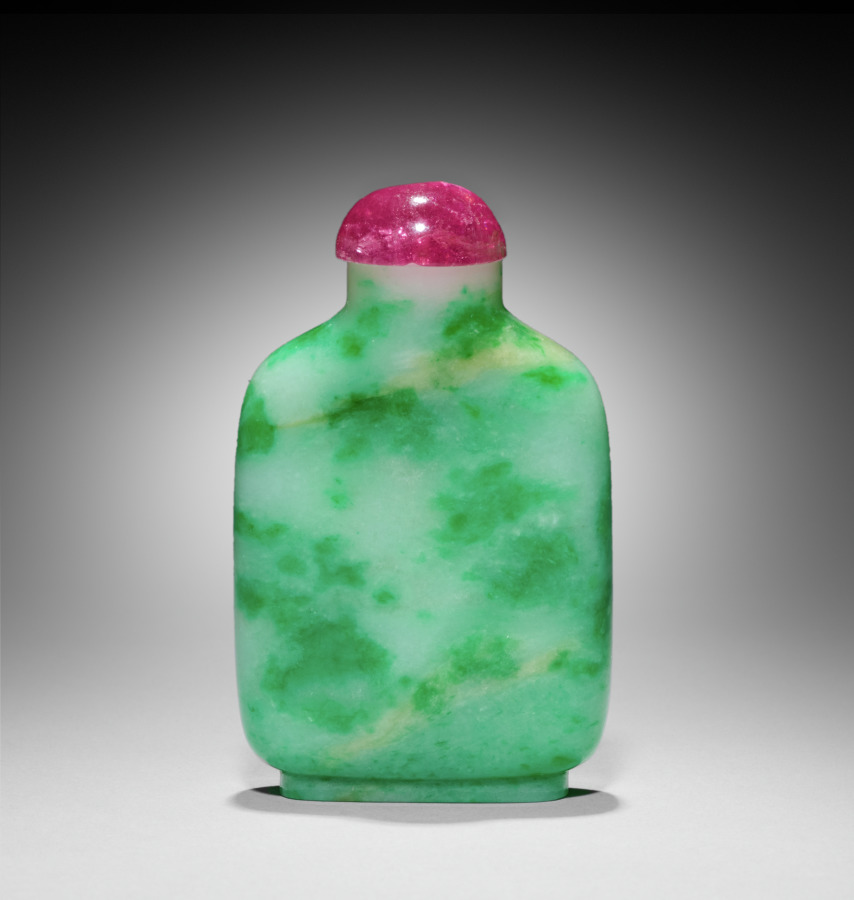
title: Snuff Bottle with Stopper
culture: China, Qing dynasty (1644-1911)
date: 1800s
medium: jade and rose quartz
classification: Jade